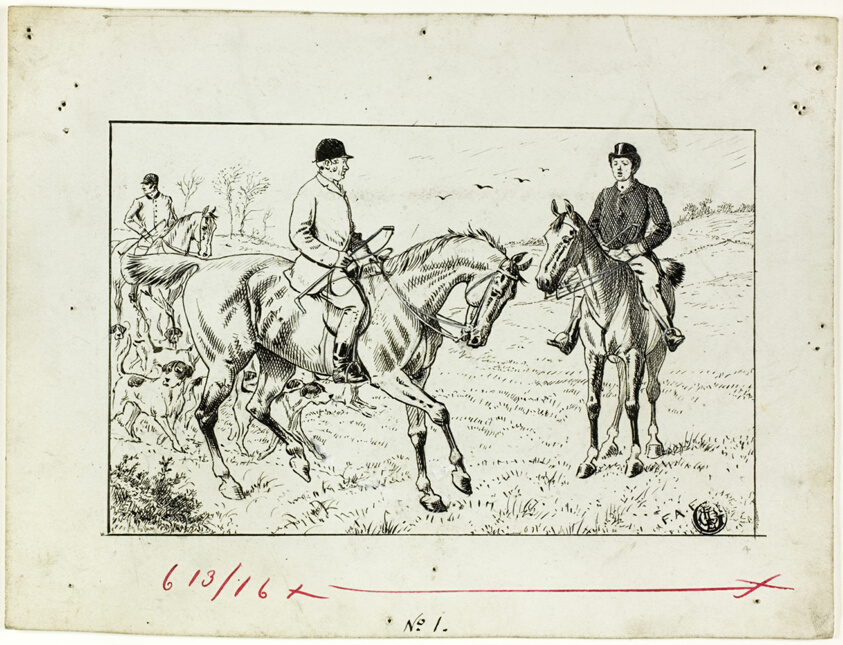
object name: Drawing and Watercolor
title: Three Riders at a Hunt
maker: Francis Arthur Fraser (English, 1846-1924)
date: 1867/83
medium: Pen and black ink, heightened with touches of white gouache, over graphite, on ivory board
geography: England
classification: pen and ink drawings; drawings (visual works); prints and drawing